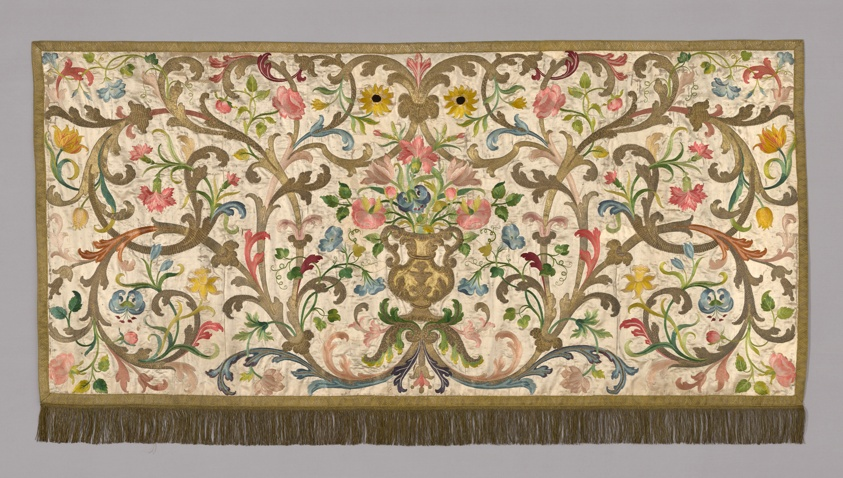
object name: Religious/Ritual Object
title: Altar Frontal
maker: Italy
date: 19th century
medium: Silk, satin weave over linen, plain weave; lined with silk in plain weave; moiré; braid in gilt over silk and yellow silk (gold fringe - twisted threads, gilt over core); embroidered in silk floss, silver and gilt over silk core with satin, (flat), long and short, stem (outline) stitches; couching and some underside couching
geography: Italy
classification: needlework (visual works); ritual objects